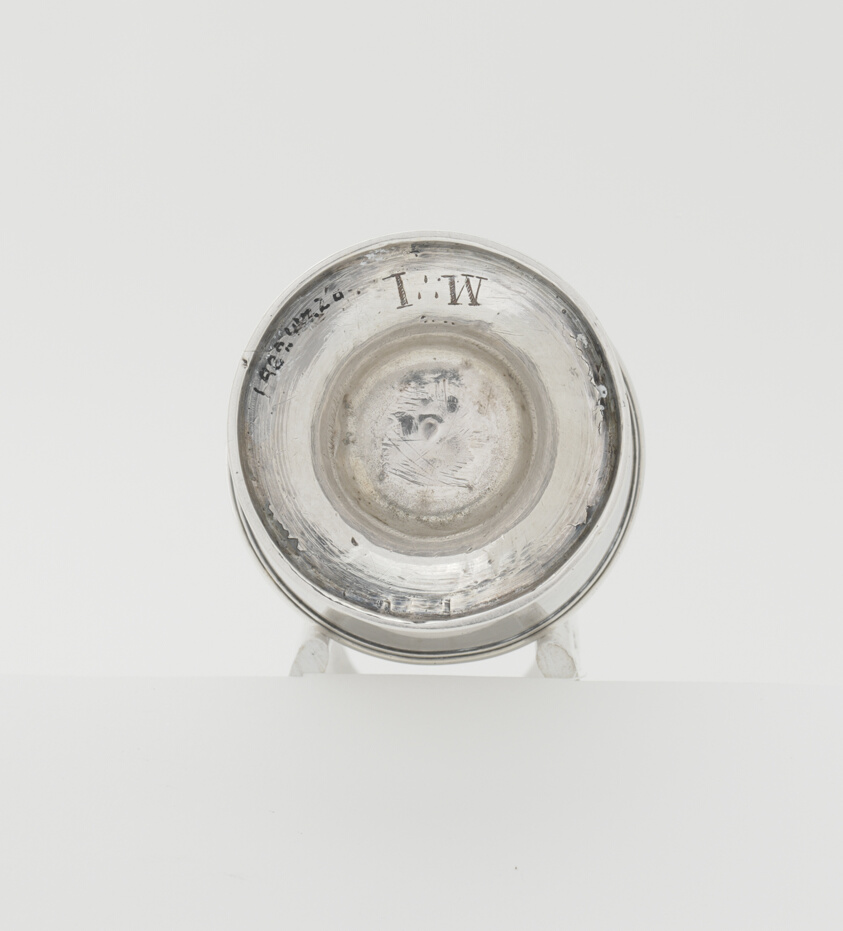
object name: Metalwork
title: Pair of Casters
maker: Attributed to Jacob Hurd; American, 1702/03–1758; Boston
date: 1740–50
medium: Silver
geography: Boston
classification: condiment vessel; silver; american decorative arts; american arts; decorative arts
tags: dining, drinking